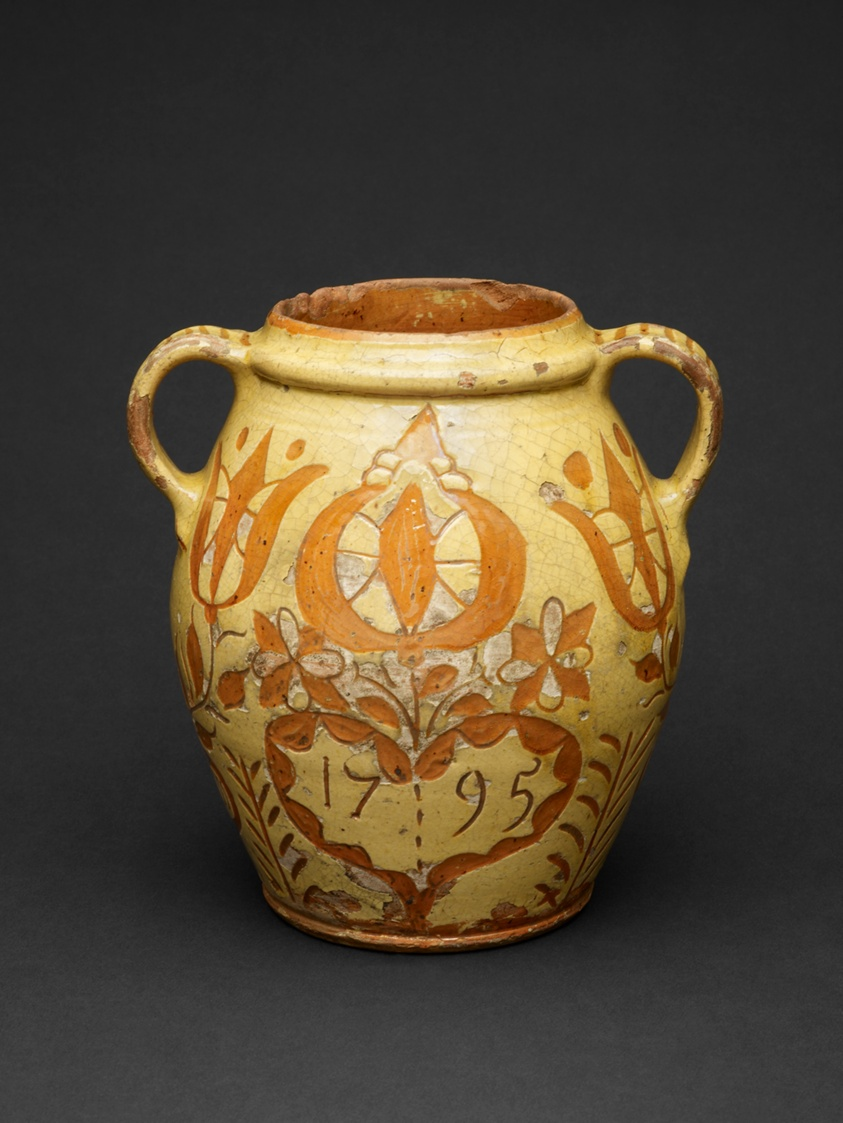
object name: Decorative Arts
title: Jar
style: Folk Art, pennsylvania german, american colonial, americas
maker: Artist unknown (American, active 18th–19th century); Southeastern Pennsylvania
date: 1795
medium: Earthenware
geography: Pennsylvania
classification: vessel; american decorative arts; american arts; ceramics; decorative arts